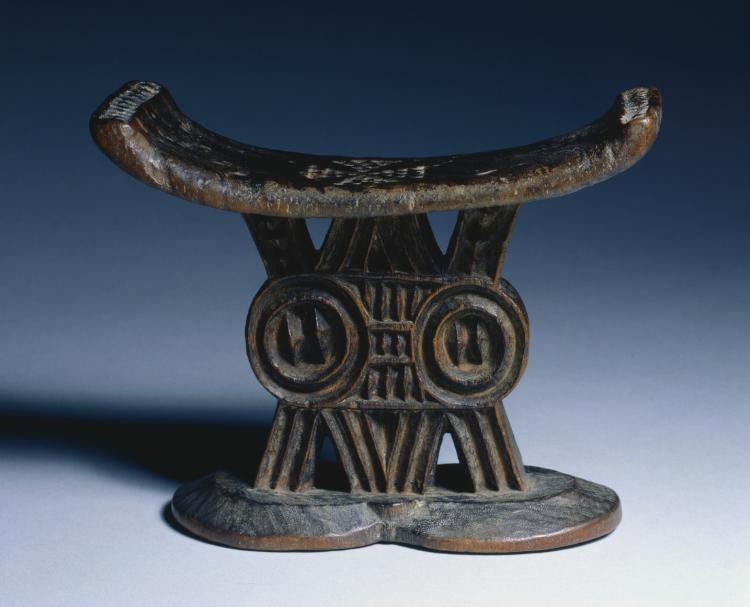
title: Headrest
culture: Africa, Southern Africa, Mozambique, Shona-style maker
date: 1900s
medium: Wood and colorant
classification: Furniture and woodwork